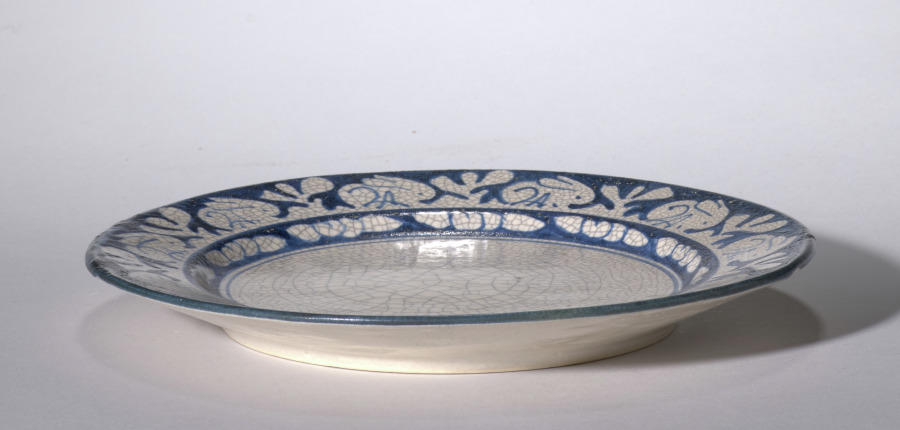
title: Small Plate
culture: America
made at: Dedham Pottery (American)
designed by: Joseph Lindon Smith (American, 1863–1950)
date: early 1900s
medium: earthenware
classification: Ceramic